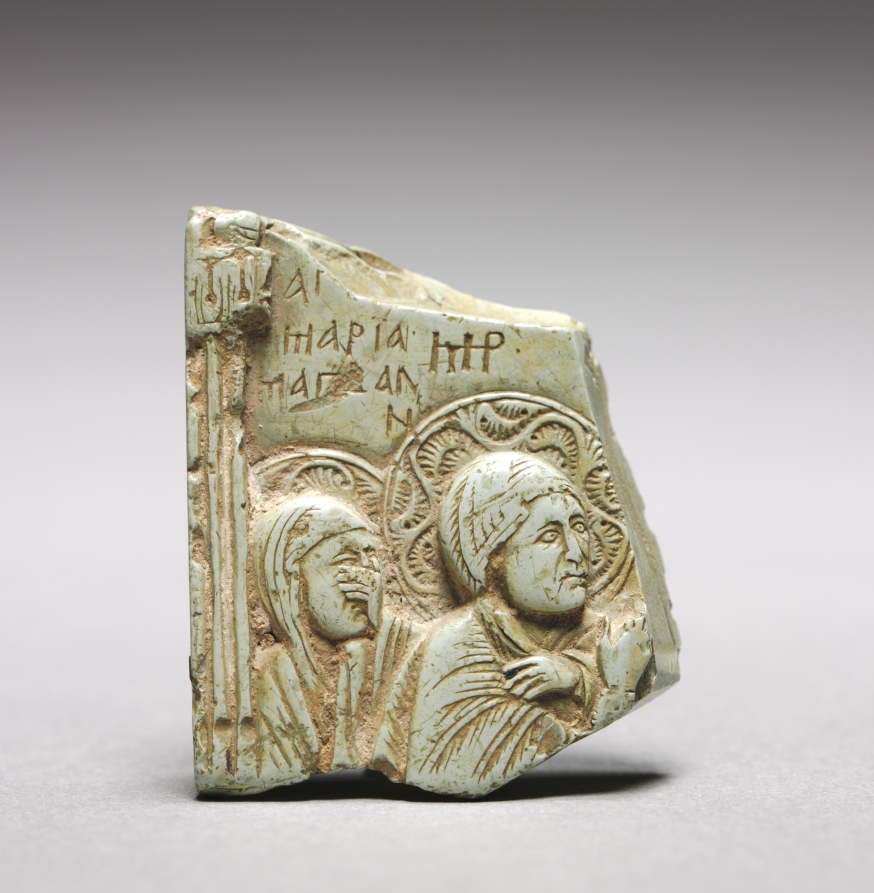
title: Fragment of an Icon of the Crucifixion with Mary Magdalene and the Virgin Mary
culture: Byzantium, Byzantine period, 14th century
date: 1300s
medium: steatite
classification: Glyptic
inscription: partial inscriptions above the figures.